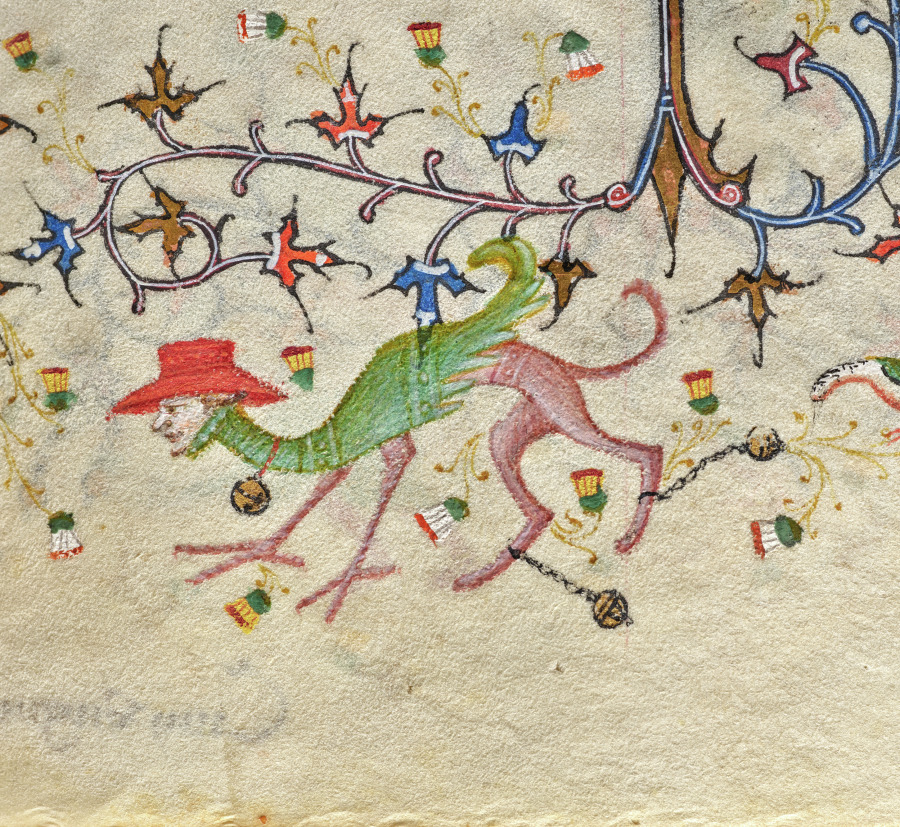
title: Hours of Charles the Noble, King of Navarre (1361-1425): fol. 103r, Text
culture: France, Paris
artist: Master of the Brussels Initials and Associates (French)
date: c. 1405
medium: ink, tempera, and gold on vellum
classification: Bound Volume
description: This precious volume was obviously highly prized by its owner, the French-born King of Navarre, who had his coat of arms painted on no less than twenty folios. Rather than directly commissioning this manuscript from a specific workshop, it seems that Charles the Noble acquired his book of hours -- perhaps ready-made for the luxury market -- while on a trip to Paris in 1404-05. A collaborative effort, six painting styles are evidenced within the pages of this codex, those of two Italians, two Frenchmen, and two Netherlanders. The painter who was responsible for the planning and decoration of the book, and who produced seventeen of the large miniatures, was a Bolognese artist known as the Master of the Brussels Initials. His principal assistant, responsible for most of the borders, was a Florentine who signed his name "Zecho" da Firenze on folio 208 verso.